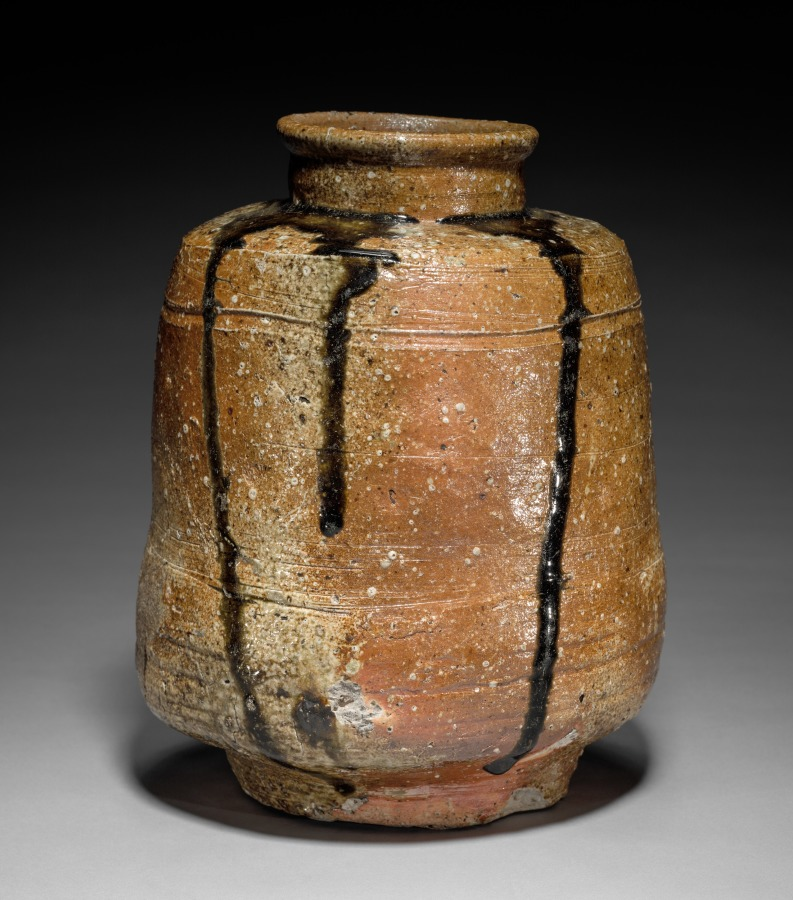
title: Tea Storage Jar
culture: Japan, Momoyama period (1573–1615)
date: 1573–1615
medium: glazed stoneware (Shigaraki ware)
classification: Ceramic